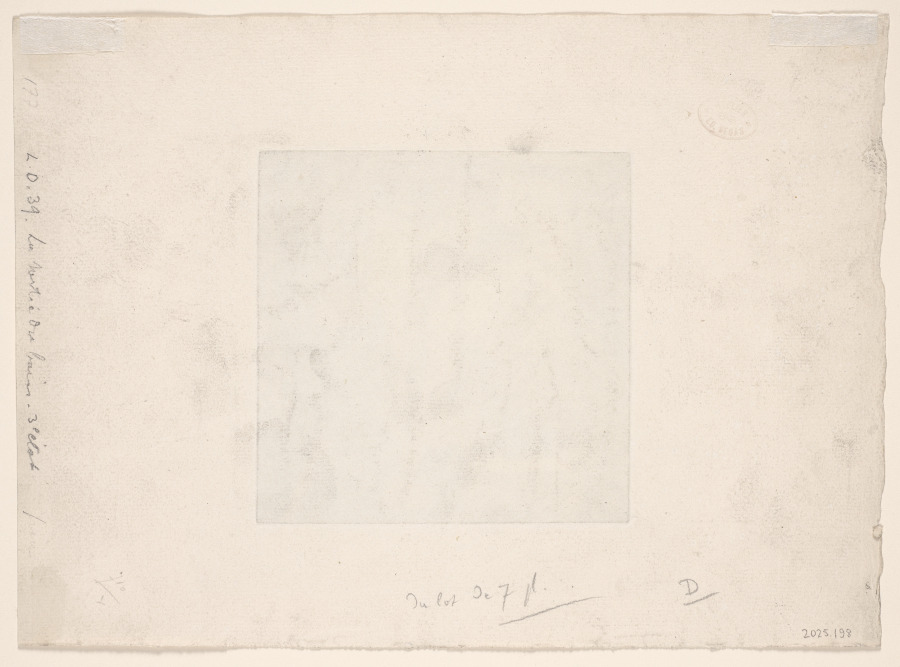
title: Leaving the Bath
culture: France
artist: Edgar Degas (French, 1834–1917)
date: 1879–80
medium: drypoint, aquatint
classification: Print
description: In Leaving the Bath, a woman is seen from behind as she awkwardly grips a tub while cautiously stepping out of it. Nearby, a maid is mostly obscured by a cloth meant to dry and warm her. Their sketchlike surroundings communicate intimacy and privacy and, in what would become a characteristic aspect of his bather imagery, Edgar Degas places the viewer in a voyeuristic perspective, with the two women unaware of our presence. The artist began to explore etching in the 1850s, registering in the print department of Paris’s Bibliothèque Nationale so that he could closely study the works of past masters such as Rembrandt van Rijn. Degas saw prints as having an important part to play in the Impressionists’ group exhibitions and displayed them alongside paintings there.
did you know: Edgar Degas created this print by drawing on a copper plate, not with a traditional etching needle, but with a copper rod—a component of early electric lamps. This nontraditional tool produced an effect that Degas appreciated, and he experimented further after bringing the plate home by working on it with materials ranging from an emery pencil to a stone.